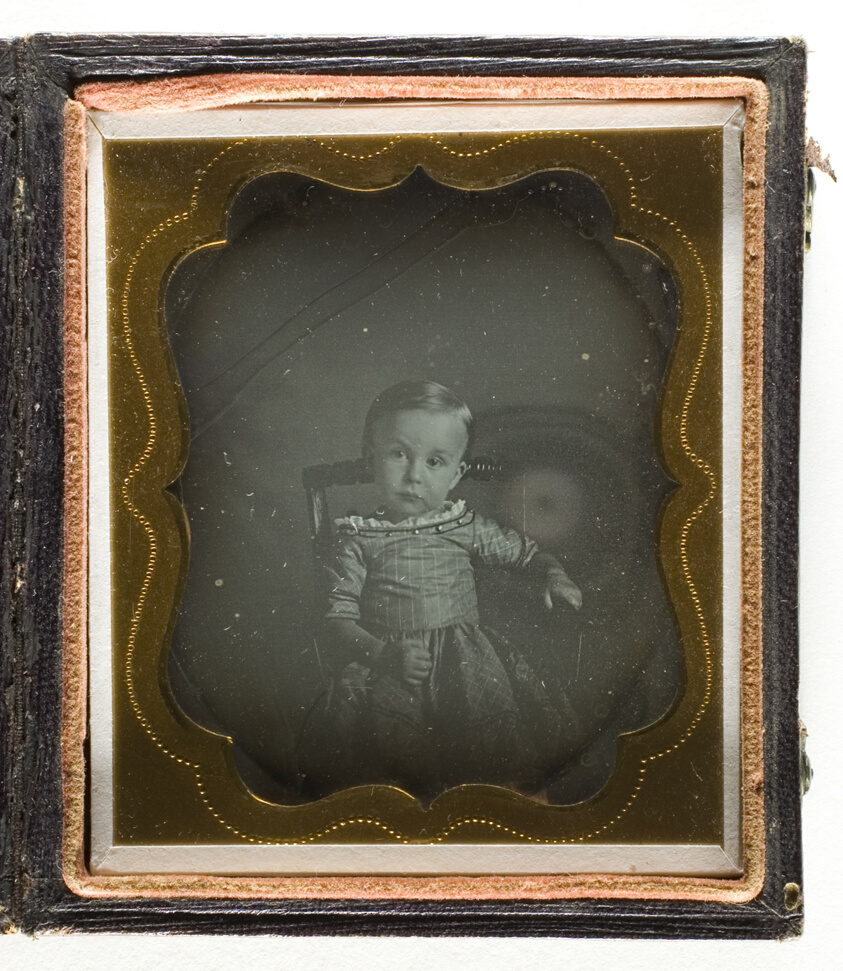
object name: Photograph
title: Eben Matthews as a Child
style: 19th century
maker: Artist unknown; American, 19th century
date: 1839/60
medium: Daguerreotype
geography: United States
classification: daguerreotype; photographic process; photography; photograph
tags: Collected by Hugh Edwards